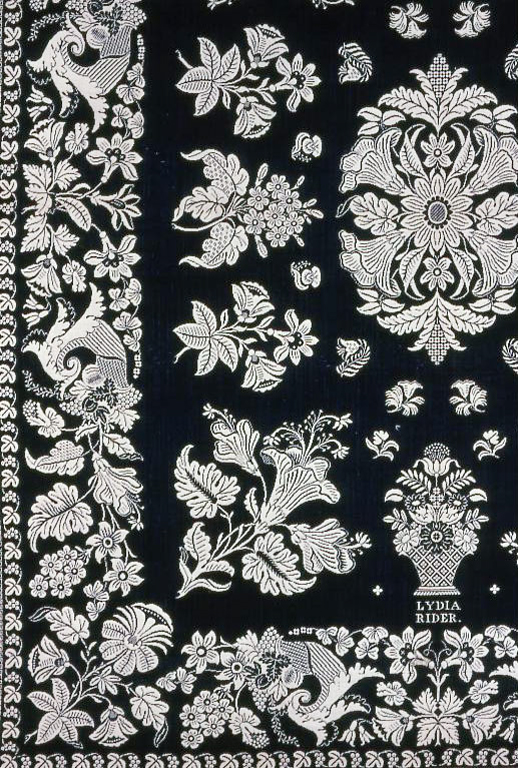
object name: Textile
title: Coverlet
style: 19th century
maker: United States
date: c. 1850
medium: Cotton and wool, plain weave double cloth with main warp fringe; probably woven on loom with Jacquard attachment; two selvages present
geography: United States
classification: weaving - coverlet; coverlet; textile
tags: floral motifs, flora, cornucopia, grapevine, coverlet